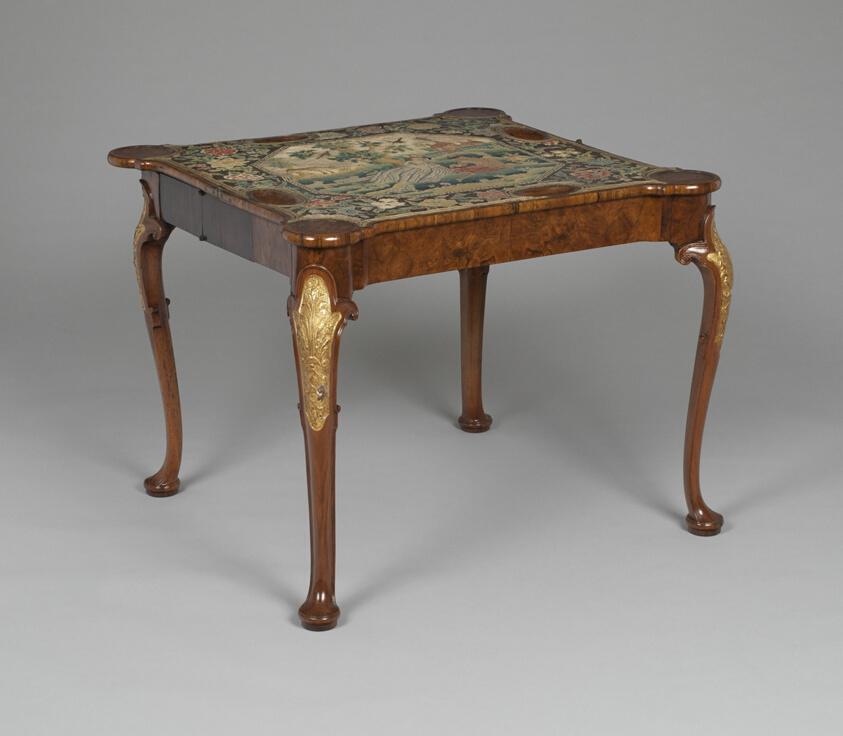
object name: Furniture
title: Card Table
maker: England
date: c. 1720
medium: Walnut, gilding, metal hinges; needlework embroidery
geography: England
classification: table; furniture; european decorative arts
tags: furniture